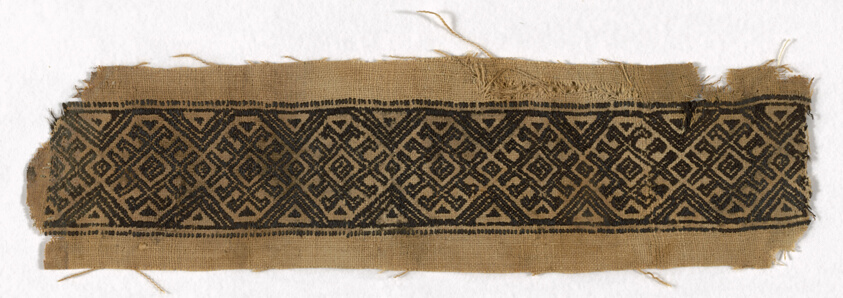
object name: Textile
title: Border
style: mamluk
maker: Coptic (Egypt)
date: Mamluk period (1250–1517), 13th/14th century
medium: silk and linen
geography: Egypt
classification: textile; needlework (visual works)